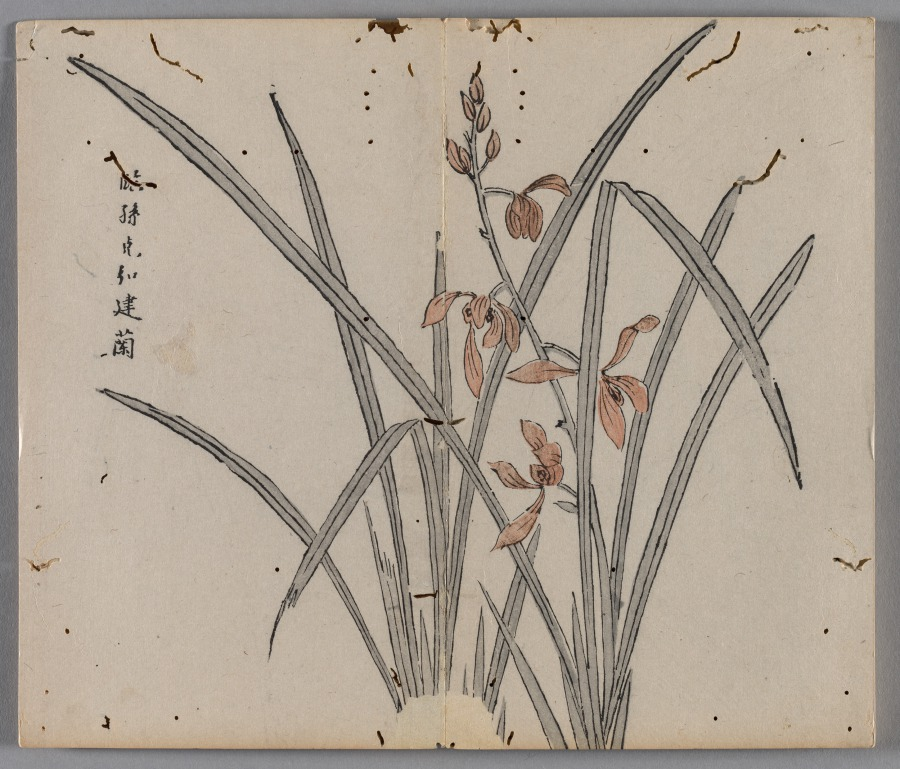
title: Ten Bamboo Studio Painting and Calligraphy Handbook (Shizhuzhai shuhua pu): Orchids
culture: China, Qing dynasty (1644-1911)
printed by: Hu Zhengyan (Chinese, c. 1584–1674)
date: 1633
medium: Woodblock-printed book; ink and colors on paper; first edition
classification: Print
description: Color printing reached a level of perfection in the early 1600s, as seen in this Ten Bamboo Studio Collection of Calligraphy and Painting and the Mustard Seed Garden Manual of Painting (printed 1679 and 1701). The painterly quality, precision in registering (aligning) the woodblocks, and harmonious colors made them the most successful color print editions in Chinese history. Both editions were printed and compiled in Nanjing, spread nationwide, and had a great impact on the arts in Japan and Korea.